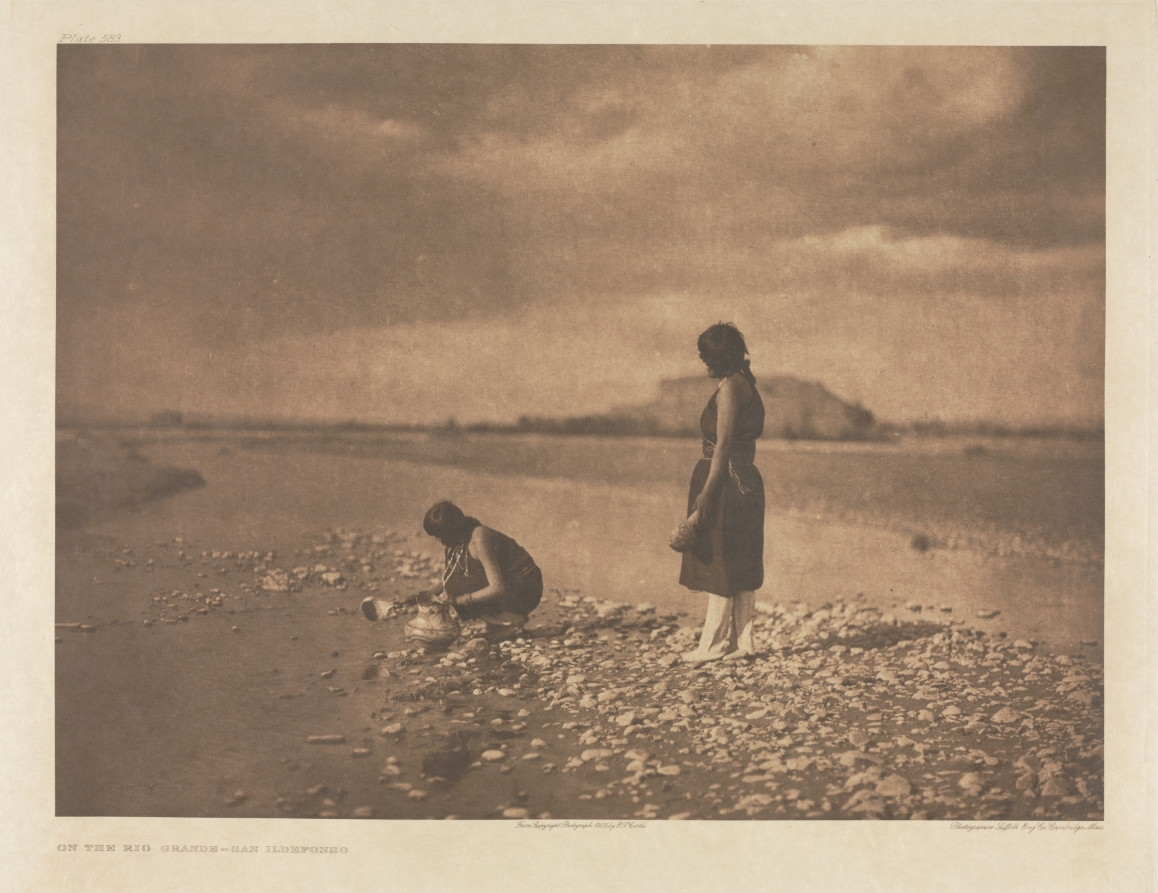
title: Portfolio XVII, Plate 583: On the Rio Grande - San Ildefonso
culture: America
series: The North American Indian: being a series of Portfolios picturing and describing the Indians of the United States, the Dominion of Canada, and Alaska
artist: Edward S. Curtis (American, 1868–1952)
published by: The University Press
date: 1905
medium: photogravure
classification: Portfolio